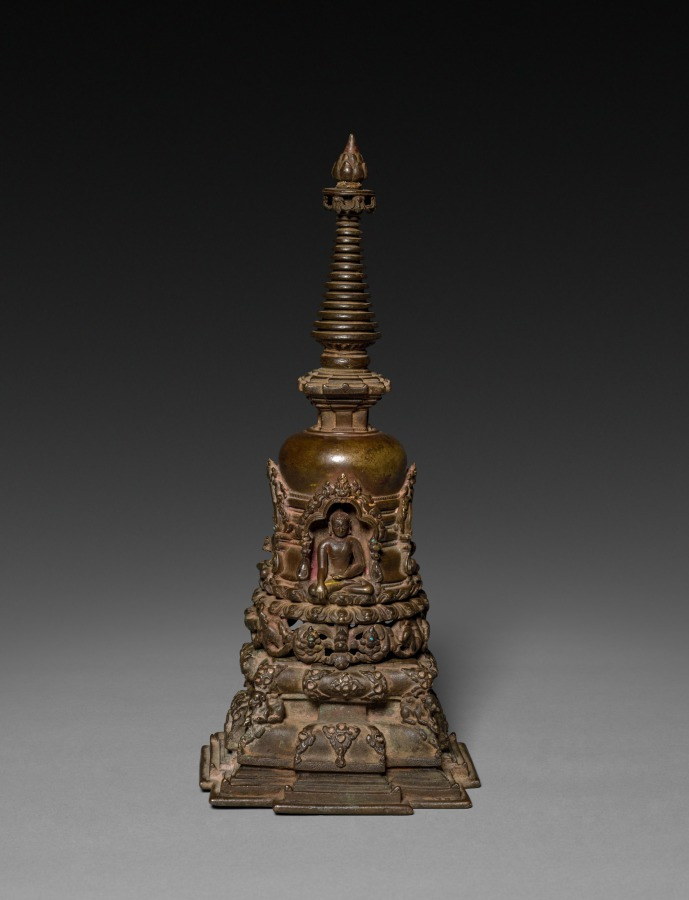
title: Miniature Votive Stupa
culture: Eastern India, Bihar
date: c. 1000s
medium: bronze with inlay of semiprecious stones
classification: Sculpture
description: Small-scale stupas were modeled on large monuments that contain relics of the Buddha or revered members of the Buddhist community within the solid, dome segment. Such models were made to commemorate a devotional visit to the monument. Four different sacred Buddhist images face each of the four directions: Shakyamuni, Vajrasattva, Maitreya, and Prajnaparamita.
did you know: The spire consists of thirteen disk-like parasols that refer to the thirteen stages on the path to enlightenment.